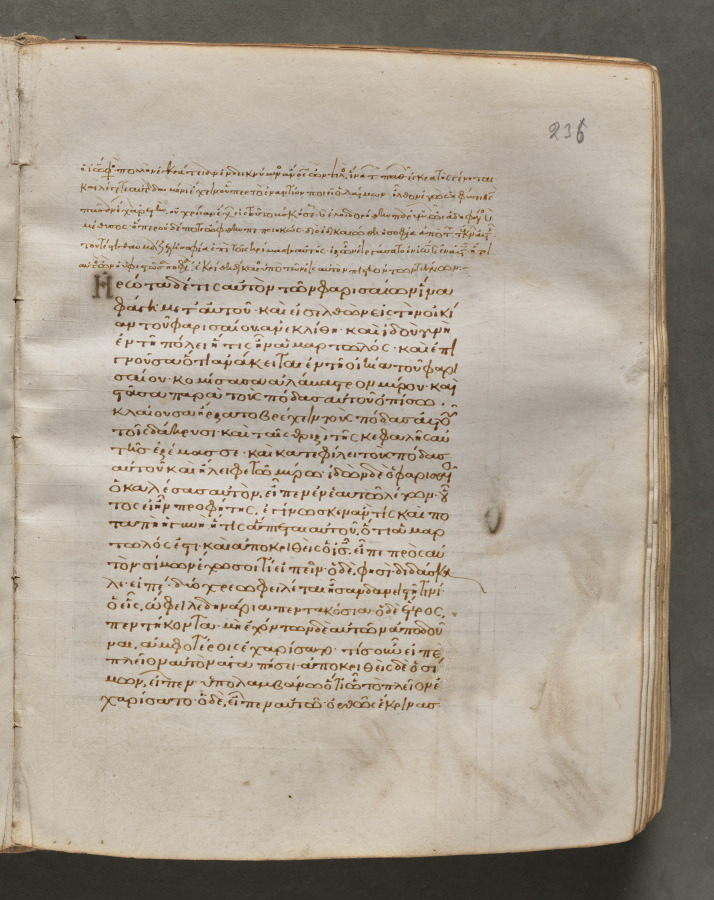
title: Text, folio 236 (recto), from a Gospel Book with Commentaries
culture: Byzantium, Constantinople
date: c. 1000–1100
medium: ink, tempera, and gold on vellum; leather binding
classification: Bound Volume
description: Each of the four gospels in this book opens on a page with brilliantly illuminated borders depicting the author of the text as well as birds—principally peacocks, symbols of the immortality of the soul—and fountains, representing the fountain of life and the salvation of the soul. This volume consists of 428 leaves with texts in Greek. Its level of sophistication suggests that it was probably written and decorated in a monastery in Constantinople.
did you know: Gospel books were carried in procession through Byzantine churches.